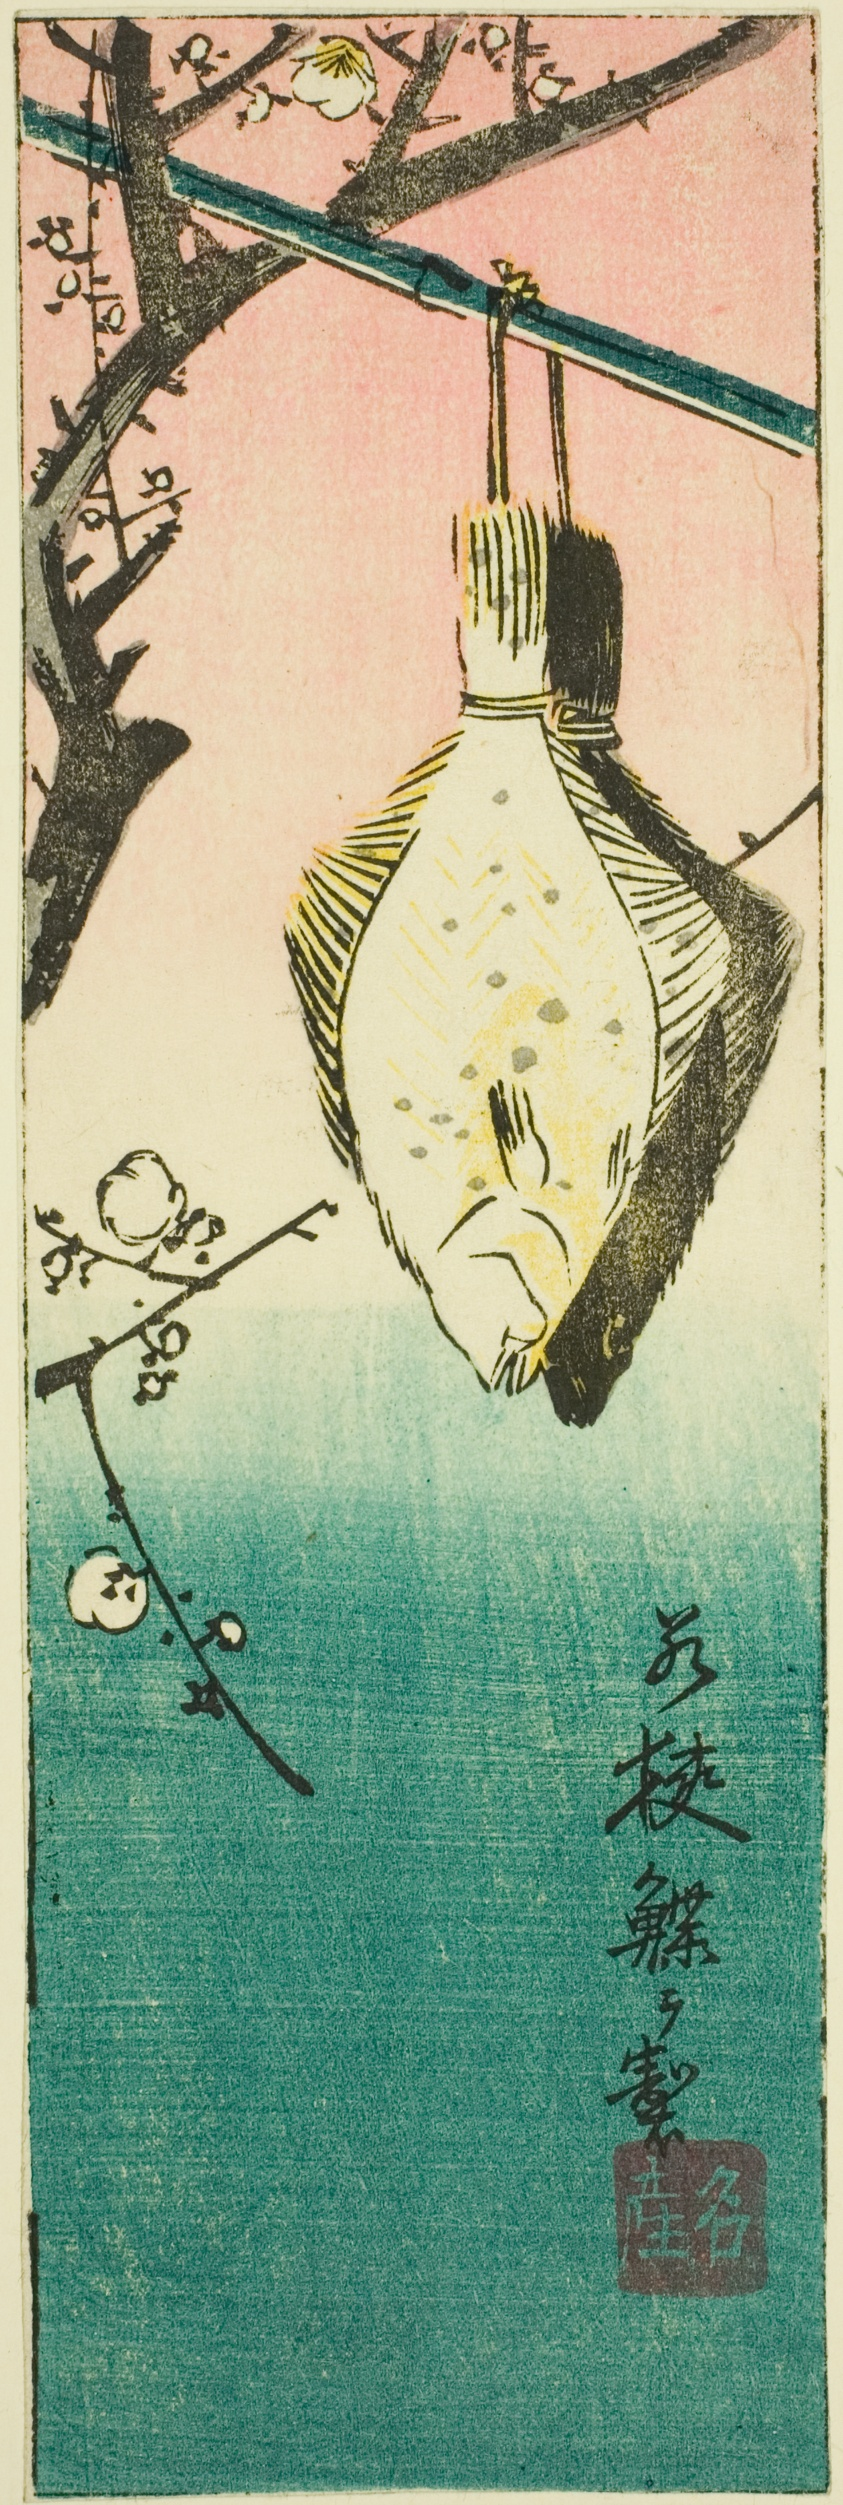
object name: Print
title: Wakasa, section of sheet no. 10 from the series "Cutout Pictures of the Provinces (Kunizukushi harimaze zue)"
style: Japanese (culture or style)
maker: Utagawa Hiroshige 歌川 広重; Japanese, 1797-1858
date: 1852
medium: Color woodblock print; section of harimaze sheet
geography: Japan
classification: woodblock print; print; asian art